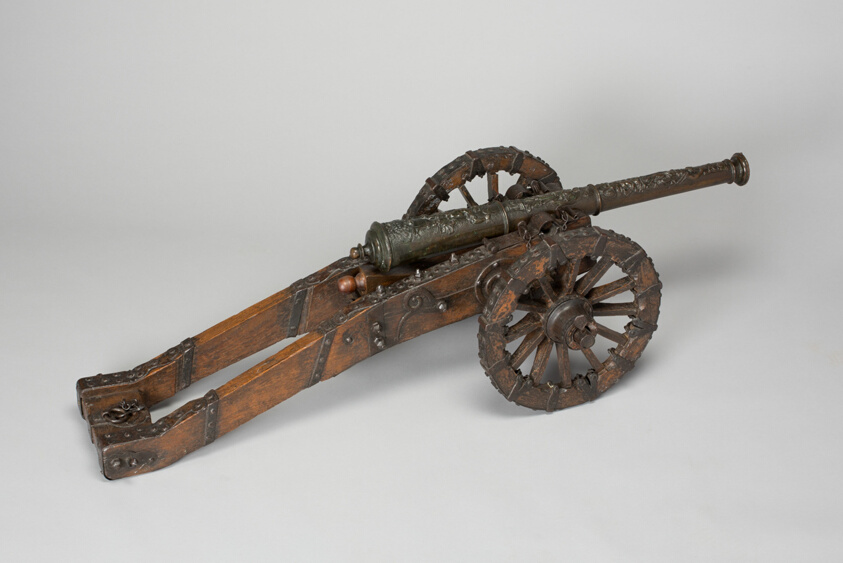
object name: Arms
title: Model Artillery with Field Carriage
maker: Master Dodemont of Normandy; French, active mid-16th century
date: 1580/1600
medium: Bronze, wood, and iron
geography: France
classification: firearm-cannon; arms; arms and armor